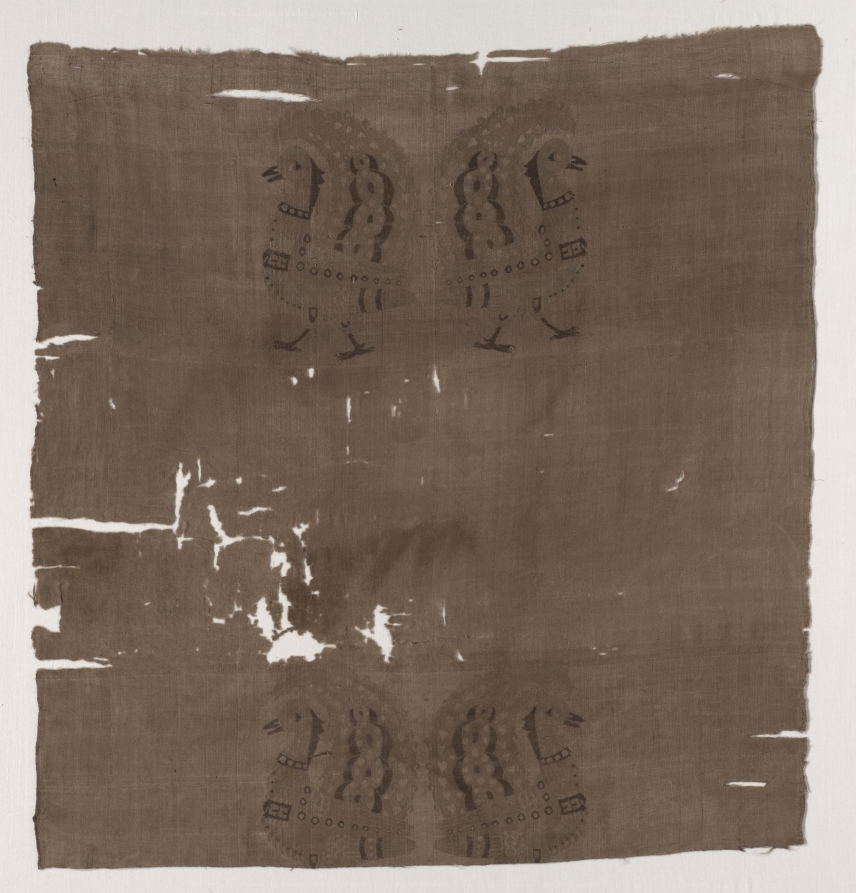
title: Fragment with peacocks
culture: Iran, in the style of the Buyid period (945–1055)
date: before 1968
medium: Silk: lampas weave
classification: Textile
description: This textile fragment preserves a pair of addorsed peacocks in tan on a plain tan background.